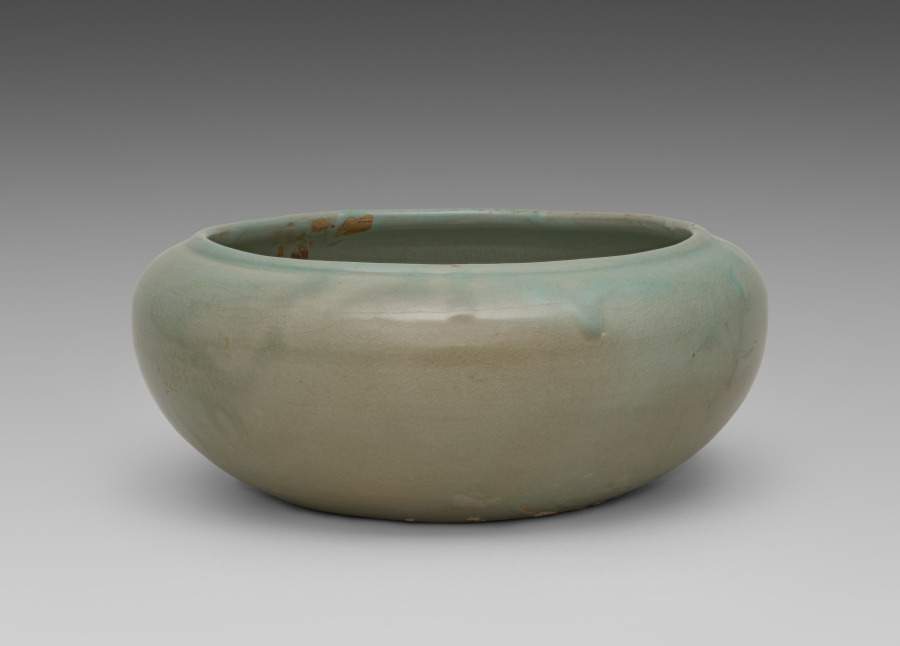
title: Bowl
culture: Korea, Goryeo dynasty (918–1392)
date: 1100s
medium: celadon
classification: Ceramic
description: As early as the seventh century, the practice of drinking tea became an important part of elite culture in Korea. In enjoying teas, elites commissioned a variety of types of utensils and vessels including this large bowl, not only to make their tea-drinking experience more exciting, but also to show their refined taste.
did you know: The distinctive bluish and greenish glaze of Goryeo celadons, shown in this bowl, is the result of distinctive small and long Korean kilns, which maintained a low oxygen saturation with a high level of carbon dioxide.